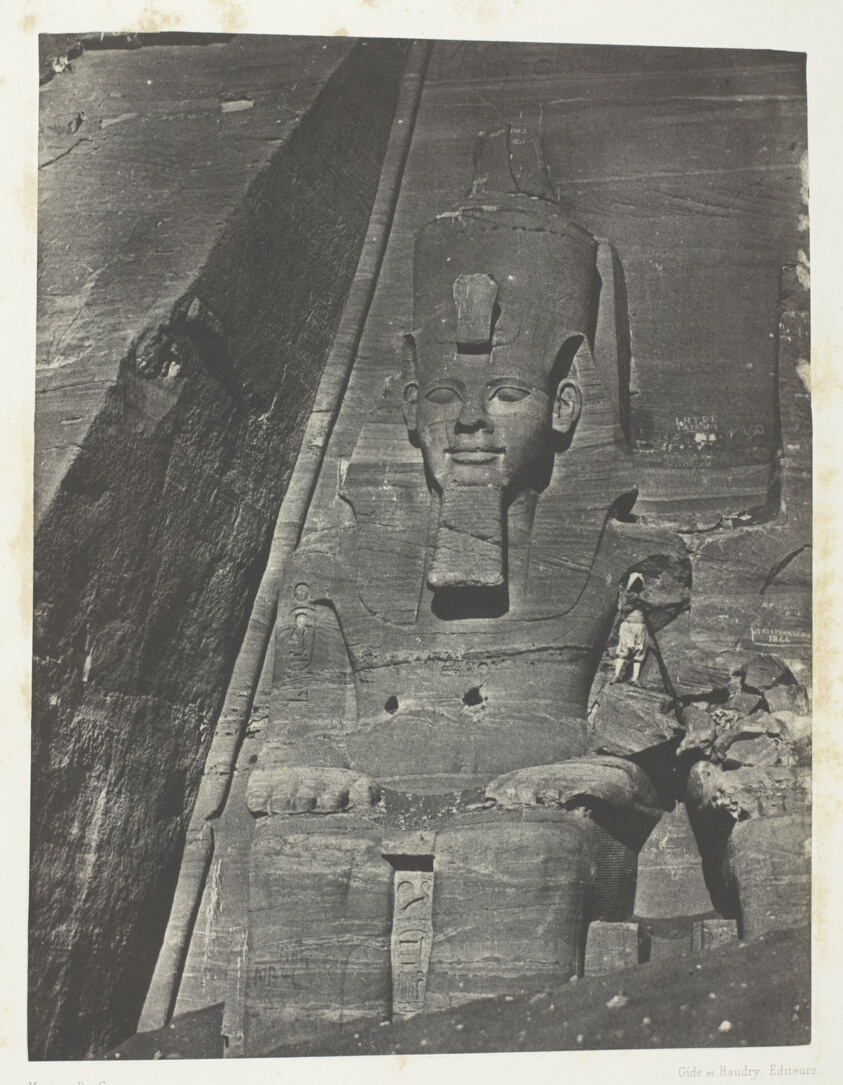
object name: Photograph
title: Ibsamboul, Colosse Oriental Du Grand Spéos De Phrè; Nubie, plate 103 from the album "Egypte, Nubie, Palestine et Syrie" (1852)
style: 19th century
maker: Maxime Du Camp (French, 1822–1894)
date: 1849/51, printed 1852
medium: Salted paper print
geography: France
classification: salted paper print; photographic process; photography; photograph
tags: Collected by Hugh Edwards, Egypte, Nubie, Palestine et Syrie